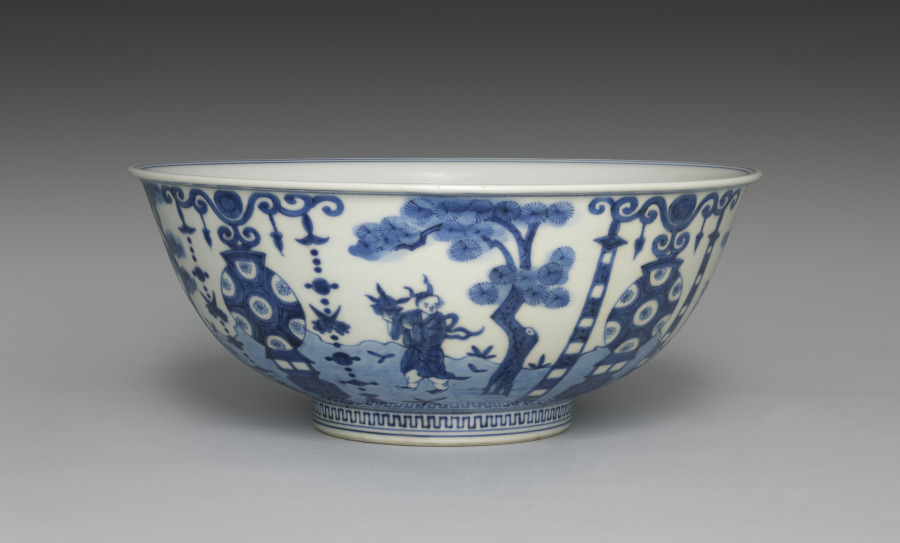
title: Bowl from Nesting Bowls with Daoist Immortals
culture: Japan, Meiji period (1868–1912)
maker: Seifū Yohei III (Japanese, 1851–1914)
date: 1893–1914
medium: Outer bowl from a set of three bowls; porcelain with underglaze blue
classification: Ceramic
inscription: 清風与平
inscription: 大日本清風造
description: Yohei III was capable of ink painting–like compositions in underglaze blue, as well as more decorative ones like that on this set of three nesting bowls. Bowls with very similar designs in five colors were produced in the reign of the Wanli emperor (r. 1572–1620) during the Ming dynasty, and Yohei must have had direct access to one of these or to a close copy. A scene of Daoist immortals is presented on the bowls. On each one, the ground plane is defined with a blue wash. Four lanterns are evenly spaced around the bowl. Two are flanked with linked-piece metalwork banners of the seven treasures. The alternate altars are adorned with textile banners. In between them are four immortals, each standing beneath a tree with small plants surrounding his feet. Two of the immortals hold fruit on a tray. Another carries an elixir-filled ewer and a willow branch. The fourth holds a swastika (manji), here an auspicious symbol, and a flower. Curiously, the inscription inside each footring reads “Made by Seifu of Great Japan,” in emulation of the dynasty and reign inscriptions that appear on Chinese ceramics; however, one can also see through the translucent glaze another inscription, “Seifu Yohei,” written in large characters within a double band of blue on the largest bowl.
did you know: In the bottom of each bowl is a scene of two robed immortals who appear to stand on a precipice in a mountainous landscape high in the clouds, with celestial orbs over their heads.